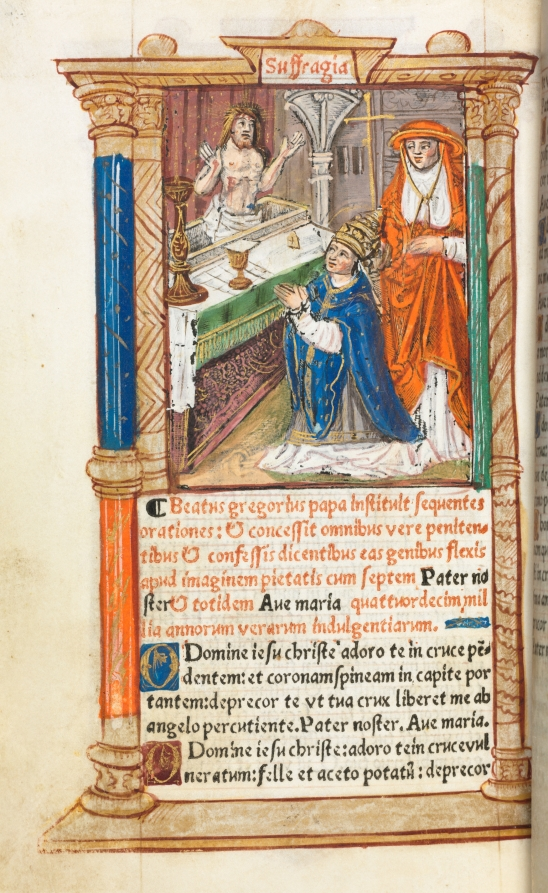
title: Printed Book of Hours (Use of Rome): fol. 96v, Mass of St. Gregory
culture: France, Paris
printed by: Guillaume Le Rouge (French, Paris, active 1493–1517)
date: 1510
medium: 112 Printed folios on parchment, bound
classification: Bound Volume